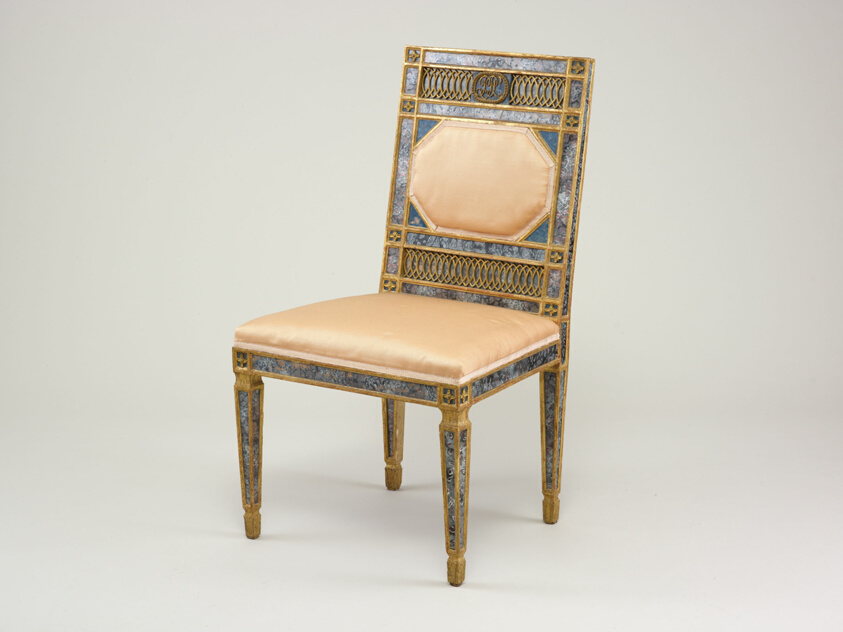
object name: Furniture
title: Side Chair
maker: Sicily, Italy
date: 1790/1800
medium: Carved, gilded and painted wood, inlay reverse painted glass, modern upholstery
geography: Sicily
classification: chair; seating; furniture; european decorative arts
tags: furniture